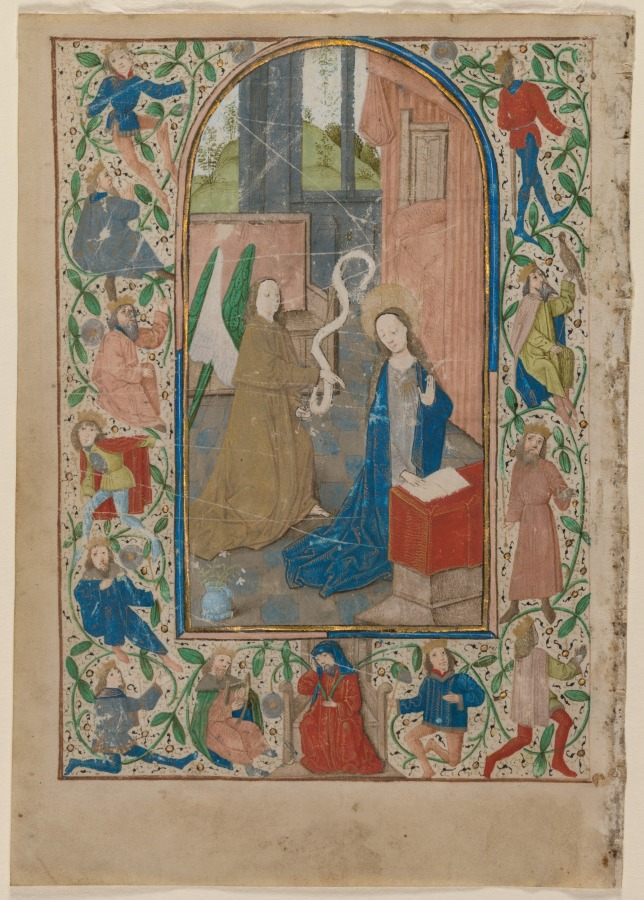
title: Leaf from a Book of Hours: The Annunciation (recto)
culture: Flanders, Ghent (?), 15th century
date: 1470s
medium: ink, tempera and gold on vellum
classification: Manuscript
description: The Annunciation is the traditional introduction to matins, the first of the eight canonical hours. This striking scene recalls the archangel Gabriel's announcement to the Virgin Mary that she was to become the mother of God. The humble scene, steeped in monumentality and innocence, honors one of the most significant moments in Christian history—the coming of God into the world. Flemish artists, in particular, tenderly elaborated this event. The Virgin is usually shown within an architectural interior. Typically her bedroom, this interior space includes a curtained bed, a wooden bench, windows through which a landscape is revealed, and a simple earthenware ewer filled with lilies that proclaim her innocence. Within this private setting, Mary kneels to read from an open book of hours. Her prayer is interrupted by the angel's appearance and she is captured by the artist in stunned surprise. The miniature is accompanied by an illustration in the margins of the Tree of Jesse, the family tree showing Jesus's human descent from Jesse, the father of King David, through the royal house of Judah. The motif begins in the lower margin with the seated Jesse, from whom a tree grows. David, Solomon, and various kings and prophets can be seen in its branches.